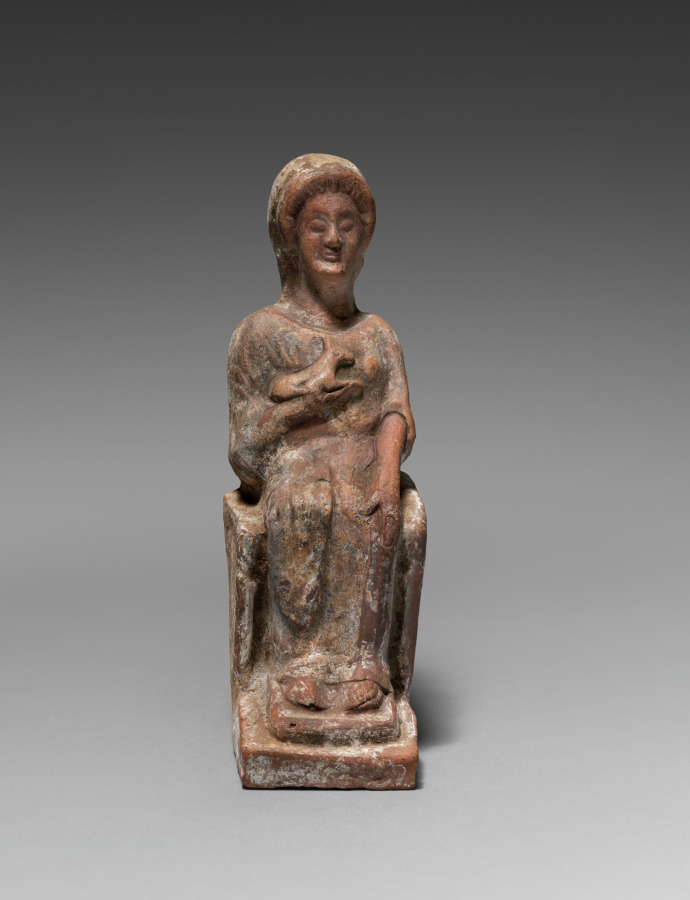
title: Archaic Figurine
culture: Greece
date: 500s BCE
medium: terracotta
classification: Sculpture